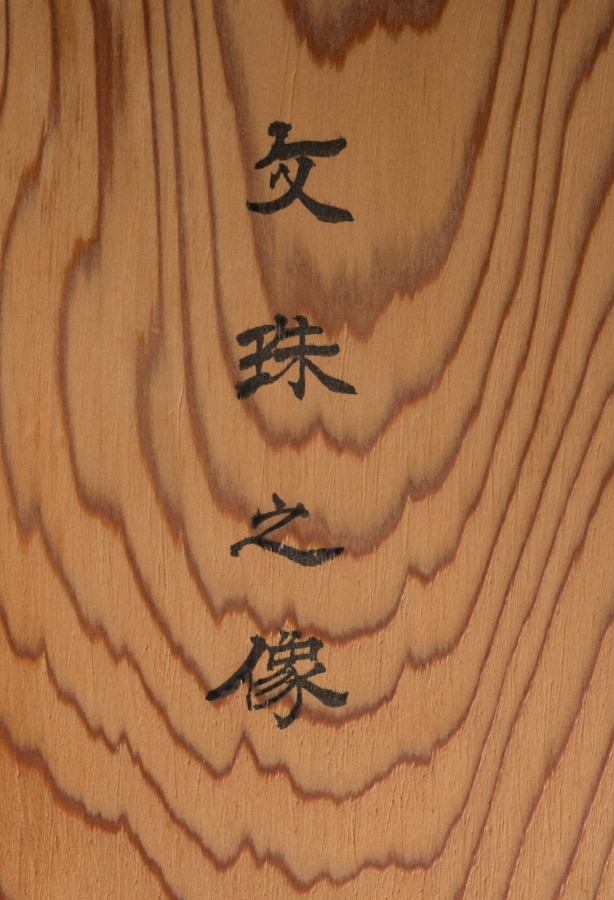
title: Monju with Five Hair Knots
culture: Japan, Kamakura period (1185–1333)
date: late 1200s–early 1300s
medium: Hanging scroll; ink, color, gold, and cut gold on silk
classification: Painting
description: This Buddhist painting shows Monju, Manjushri in Sanskrit, riding a lion. Monju is a bodhisattva, a being who, though enlightened, chooses not to become a Buddha but instead helps others achieve enlightenment. Monju’s youthfulness symbolizes his pure wisdom, unsullied by the world, and his five hair knots represent his vow to keep calamity at bay. The supernatural nature of his lion is emphasized by its hair, every strand painted in gold, as well as by the lotus platforms beneath each of its feet. The boy’s bejeweled body and silk finery is meant to resemble that of an Indian prince.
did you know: This painting is exemplary of the Kamakura period, known for artworks with special attention paid to the realism of images.